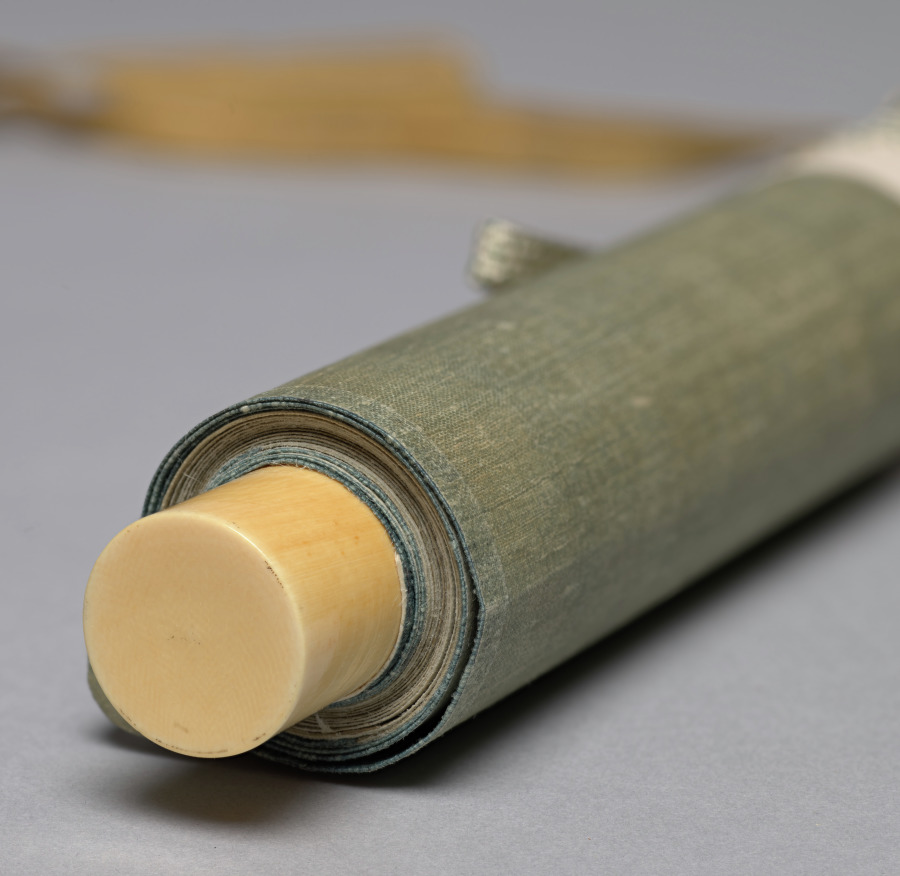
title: Listening to the Wind in the Pines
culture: Japan, Muromachi period (1392–1573)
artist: Ikkyū Sōjun (Japanese, 1394–1481)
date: 1400s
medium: hanging scroll; ink on paper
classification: Painting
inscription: 山居僧聴松風/何須臨済徳山禅一箇住山/三十年公案工夫了畢後/長松風静罷参眠 (transcribed by Trevor Menders with Zheng Xiaoying 2017, revised by Osvaldo Mercuri 2021)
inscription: 紫野龍寶門客东海純一休老和尚畫と詩一筆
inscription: 落款 一休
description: A monk sits in contemplation below an overhang covered with pine. The poem, titled "Monk in the Mountains Listening to the Wind in the Pines," refers to two Chinese Chan (Zen) Buddhist monks active in the ninth century. It may be translated as follows: Why must the Zen of Rinzai (Linji Yixuan) and Tokusan (Deshan Xuanjian) reside in a single temple for thirty years? Once he's solved his kōan, (the monk) ends his practice and falls asleep in the quietness of the wind among the tall pines. (translated by Osvaldo Mercuri) According to an inscription following the poem, both painting and verse were done by an eminent Japanese Buddhist monk known for revitalizing the Kyoto temple Daitokuji.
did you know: The word mountain, appearing in the title to the poem on this painting, can also refer to a temple.